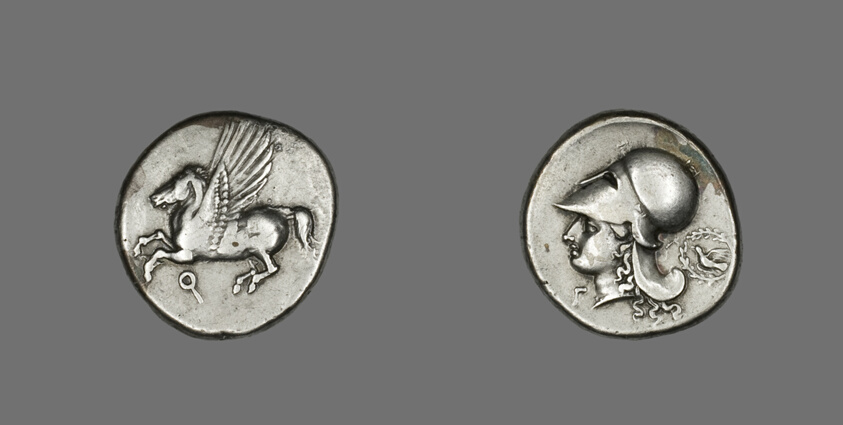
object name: Coin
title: Stater (Coin) Depicting Pegasus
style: Classical, late classical, greek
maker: Greek; minted in Corinth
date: 350-338 BCE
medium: Silver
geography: Corinth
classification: coin; ancient art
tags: mythological figures